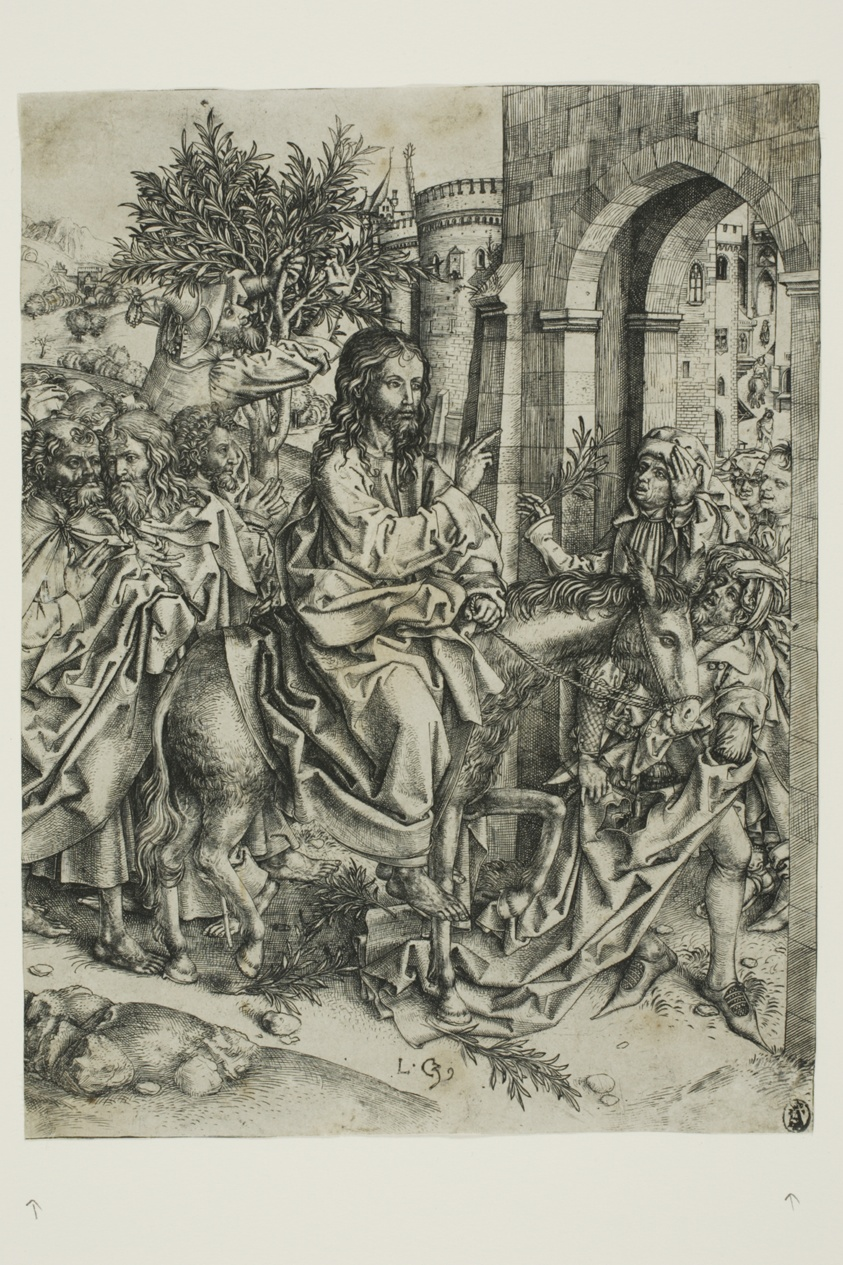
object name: Print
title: Christ's Entry into Jerusalem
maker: Master of the Strache Altar (German, active 1480-1500)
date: c. 1500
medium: Engraving on ivory laid paper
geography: Germany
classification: engraving; print; prints and drawing